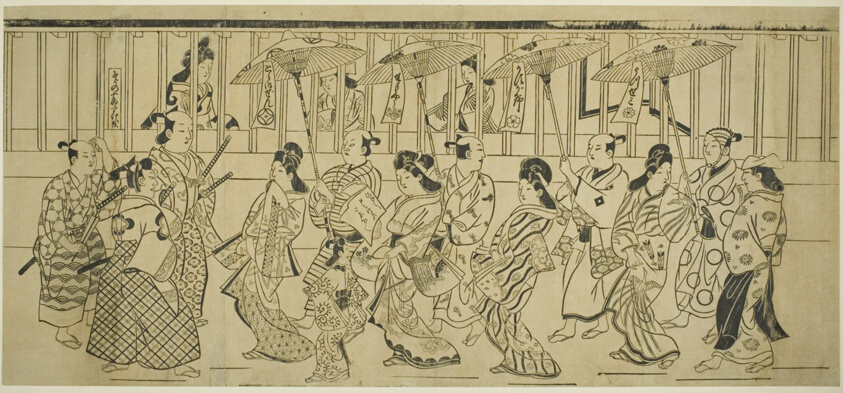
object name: Print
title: A Parade of Courtesans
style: Japanese (culture or style)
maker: Attributed to Hishikawa Moronobu; Japanese, (?)-1694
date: c. 1690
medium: Woodblock print; sumizuri-e, kakemono yoko-e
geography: Japan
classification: woodblock print; print; asian art; woodblock